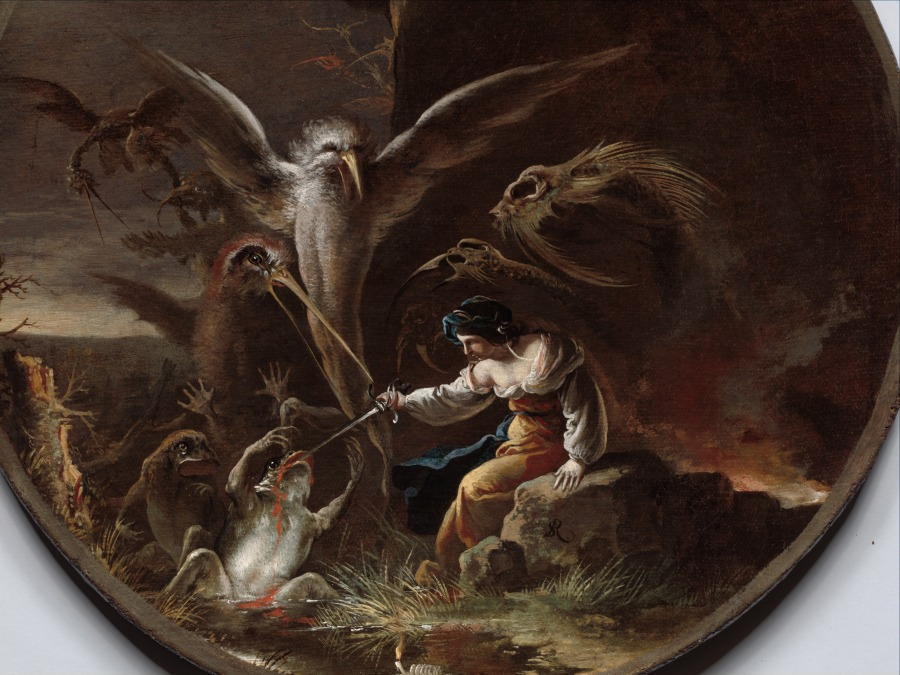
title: Scenes of Witchcraft: Morning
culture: Italy, 17th century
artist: Salvator Rosa (Italian, 1615–1673)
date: c. 1645–1649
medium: oil on canvas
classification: Painting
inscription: Signed: "SR [monogram]"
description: Rosa's first scene depicts a young witch who plunges her knife into a writhing amphibian at dawn. The dark clouds of daybreak and anthropomorphic crags provide a gloomy atmosphere, while malevolent birds with piercing beaks hover around the central stabbing, focusing the viewer's attention on the witch's vicious act. The only beautiful enchantress Rosa ever painted, her elegance and ability to transform men into animals evokes the goddess Circe. But Rosa wasn't interested in classical imagery; he inverted expectations by transforming Circe into an explicitly violent sorceress. Her calm expression makes the terrifying gesture of upraised human hands among the birds even more disturbing.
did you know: The artist chose the painting's shape to reference the foundational role of the circle in practicing magic.